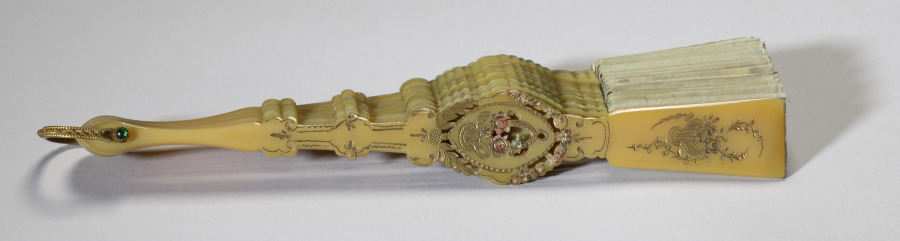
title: Fan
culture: Europe, 19th century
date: 1850–1899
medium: celluloid with gold leaf and paint, mother-of-pearl, painted and gilt silk, gilt copper alloy with green glass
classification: Ceramic